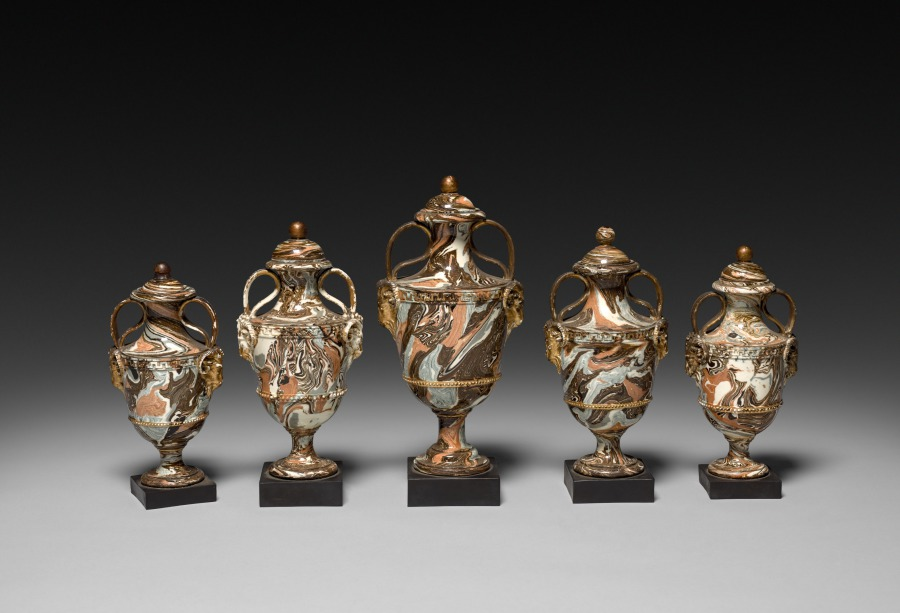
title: Urn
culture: England, late 18th or 19th century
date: late 1700s - 1800s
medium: earthenware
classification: Ceramic